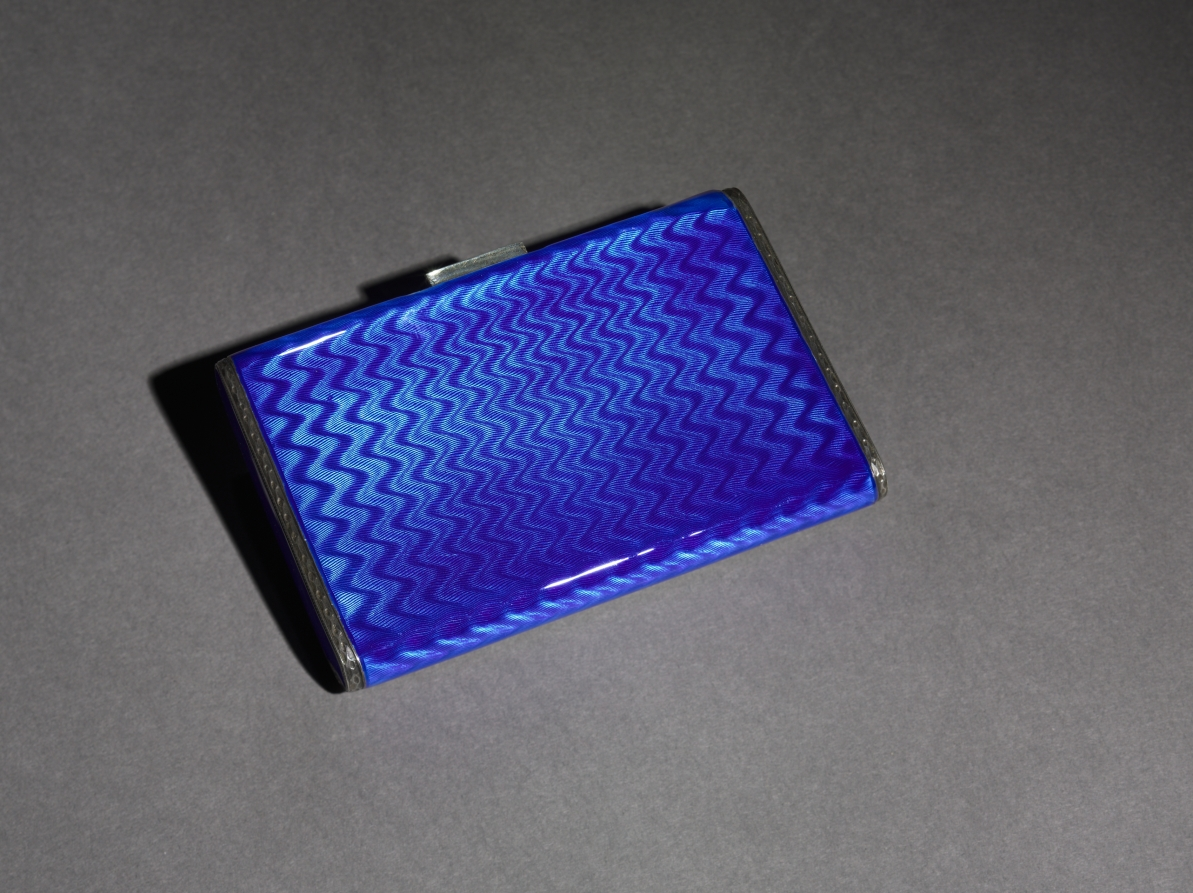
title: Cigarette Case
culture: possibly German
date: c. 1840–50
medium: enamel, cut steel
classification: Enamel